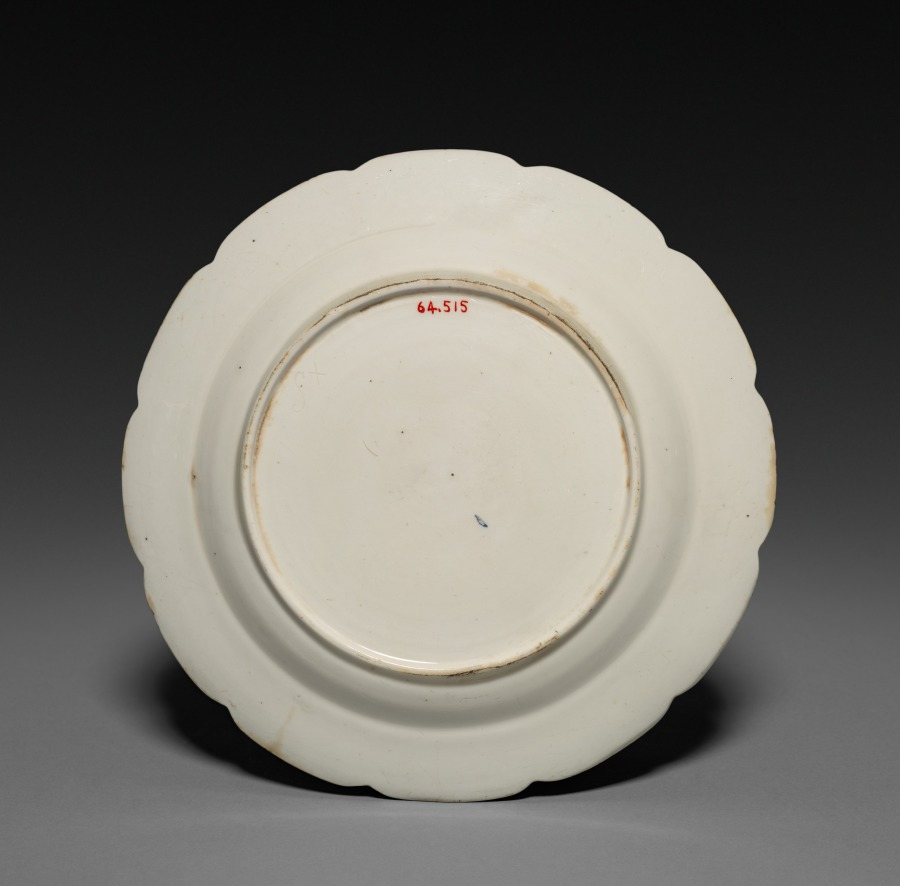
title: Plate (Assiette)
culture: France, 18th century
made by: Sceaux Factory (French, active 1748–66)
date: c. 1775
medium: soft-paste porcelain with enamel decoration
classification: Ceramic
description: In an effort to remain competitive in the porcelain market, European porcelain factories borrowed motifs, designs, and techniques from one another. Though this plate was produced at the Sceaux porcelain factory, its painting of two putti lounging on a bank of clouds likely took inspiration from the work of François Boucher, who worked at the Vincennes-Sèvres factory in the mid-1700s.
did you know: This plate is painted en camaïeu, a technique popular in 18th-century porcelain in which several tints of a single color are used to create a monochromatic image.